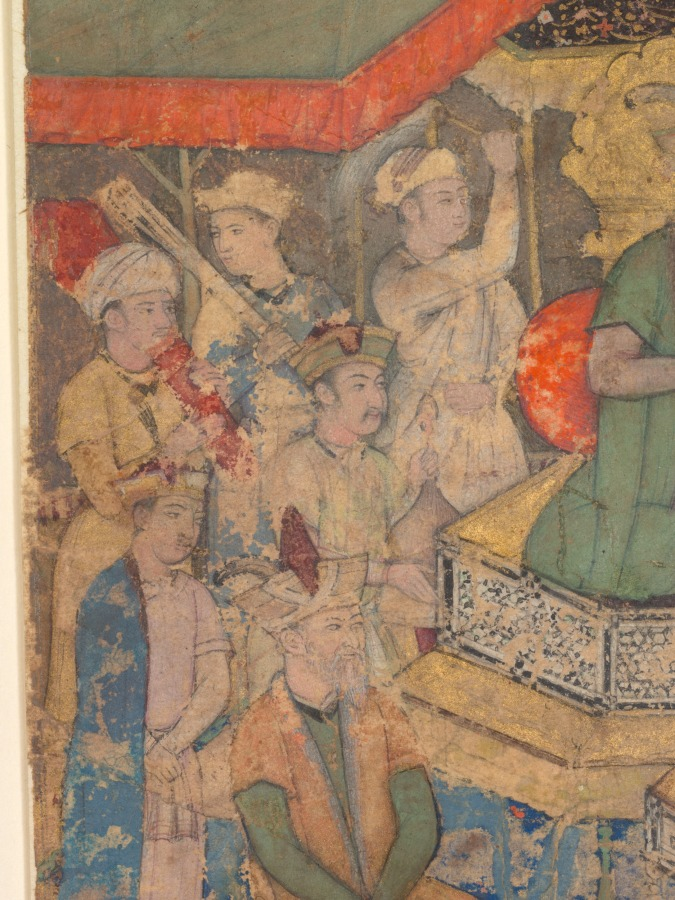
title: An Ambassador before Humayun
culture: Mughal India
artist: attributed to Miskin (Indian, active 1570s–c. 1604)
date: c. 1610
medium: Gum tempera and gold on paper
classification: Painting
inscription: Persian inscription at upper left probably added c. 1700s, in nasta‘liq script: the work of the master Miskin / Great King Hasan . . .]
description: Humayun, the second Mughal emperor of India, son of Babur and father of Akbar, is enthroned in an outdoor royal encampment. The scene recalls Humayun’s 15 years of exile between 1540 and 1555, many of which he spent traveling through Pakistan, Afghanistan, and Iran, after an Afghan rebel ousted him from India.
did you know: Humayun wore a special type of turban, his Taj-i Izzat (Crown of Power and Glory).